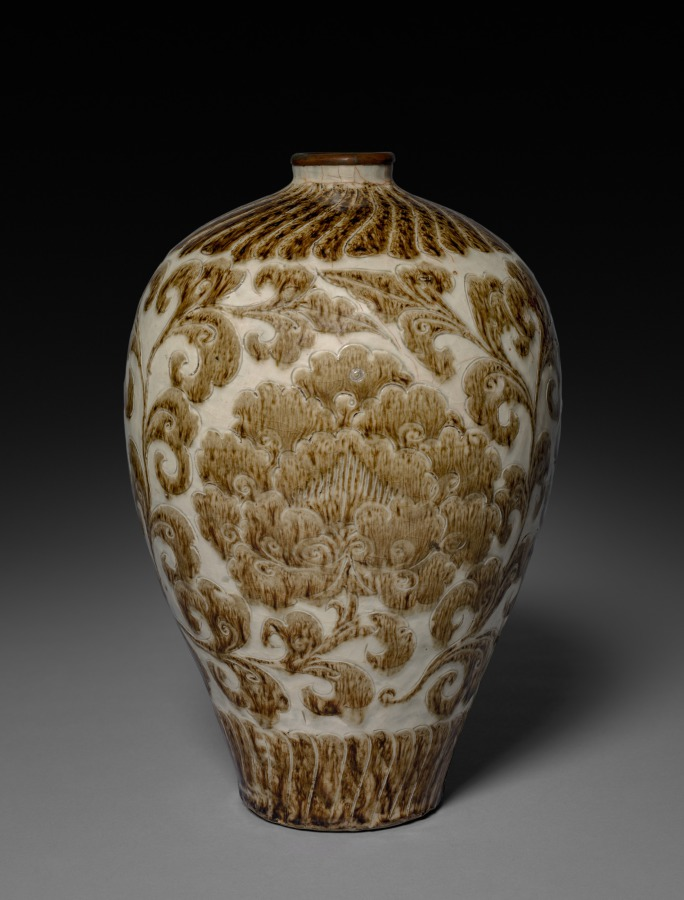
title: Meiping Vase: Cizhou Ware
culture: China, Northern Song dynasty (960-1127)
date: 1100s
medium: Buff stoneware with carved underglaze slip decoration, Cizhou ware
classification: Ceramic